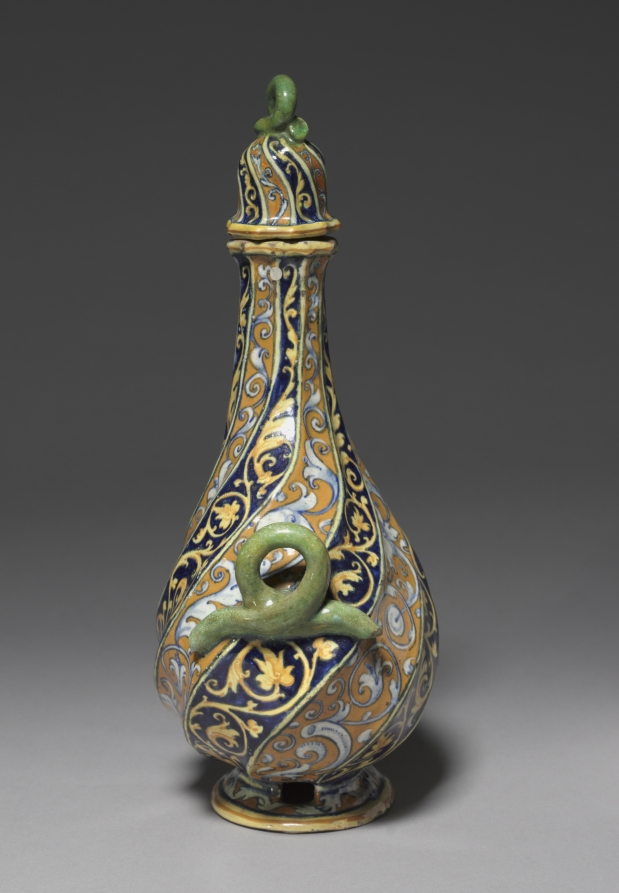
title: Pilgrim Bottle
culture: Italy, Papal States, Faenza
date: c. 1540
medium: tin-glazed earthenware (maiolica)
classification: Ceramic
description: During the Italian Renaissance of the 1400s and 1500s, nobles and merchants eager to express their wealth and sophistication ordered ceramics for dining, display, and storage. Known as maiolica, because it resembled the brightly colored ceramics from the Mediterranean island of Majorca, these ceramic vessels were covered with a tin glaze that provided an opaque white surface on which colorful decoration could be painted.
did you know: This pear-shaped vessel recalls flasks that early travelers tied to the harnesses of their horses on long trips or pilgrimages to holy sites.